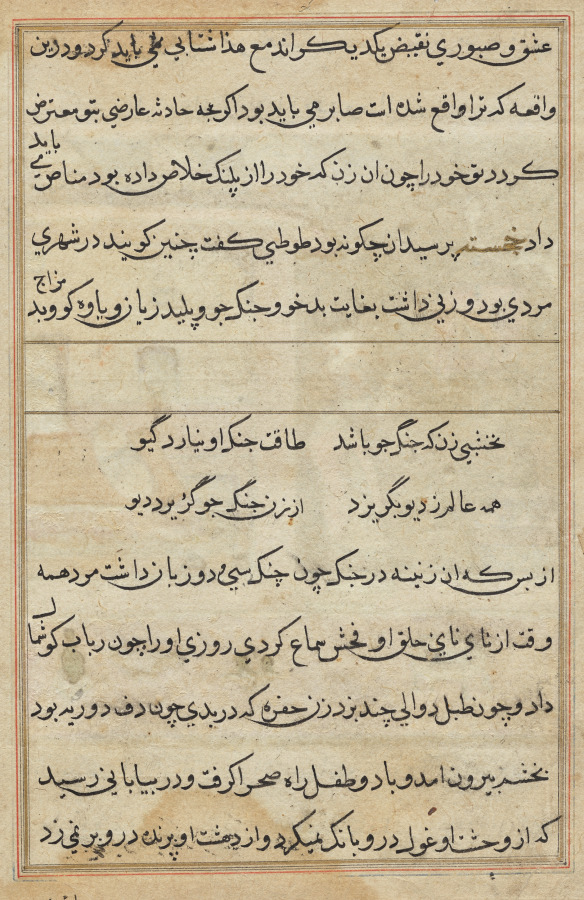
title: Page from Tales of a Parrot (Tuti-nama): text page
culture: Mughal India, court of Akbar (reigned 1556–1605)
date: c. 1560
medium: gum tempera, ink, and gold on paper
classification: Painting